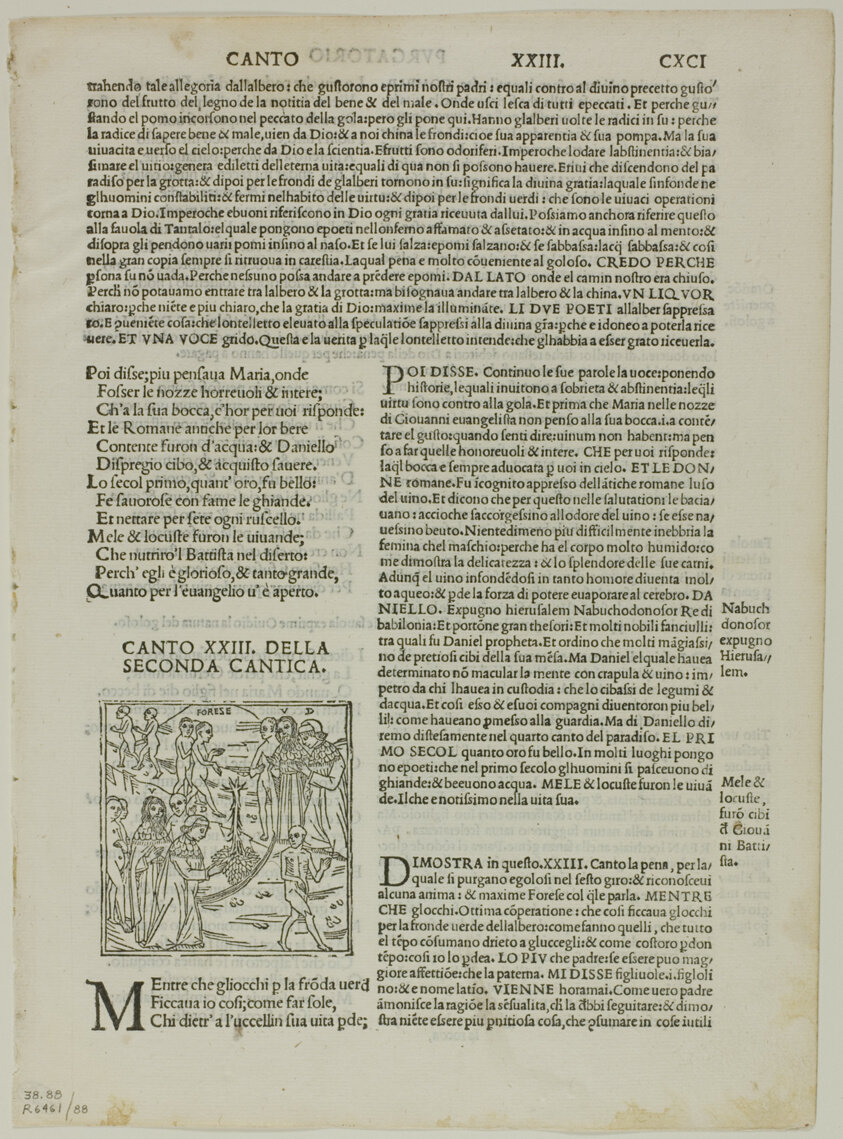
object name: Print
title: Illustration to Comedia di Danthe Alighieri, Purgatory, Canto XXIII, plate 88 from Woodcuts from Books of the XVI Century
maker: Unknown Artist (Italian, 16th century); assembled by Max Geisberg (Swiss, 1875-1943)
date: 1529, assembled into portfolio 1937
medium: Woodcut on paper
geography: Italy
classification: woodcut; print; prints and drawing